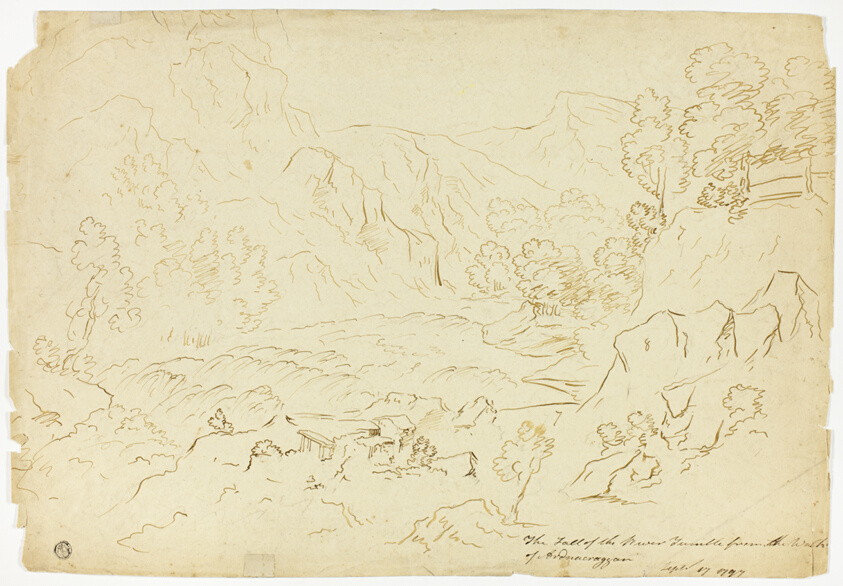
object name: Drawing and Watercolor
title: The Fall of the River Tumble (recto); View of Fastraly (verso)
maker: Attributed to Joseph Mallord William Turner; English, 1775-1851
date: 1797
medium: Pen and brown ink, over graphite (recto and verso), on cream wove paper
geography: England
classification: pen and ink drawings; paper; drawings (visual works); prints and drawing